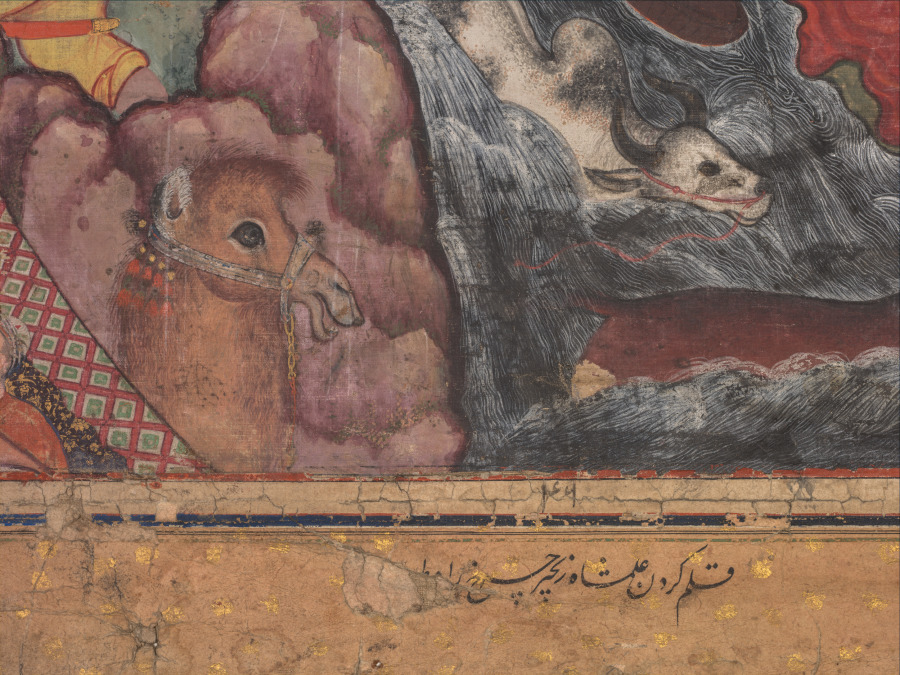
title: Alamshah cleaving asunder the chain of the wheel, from volume 11 of a Hamza-nama (Adventures of Hamza)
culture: Mughal India, court of Akbar (reigned 1556–1605)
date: c. 1560s–70s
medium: Gum tempera, ink, and gold on cotton and paper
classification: Painting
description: The hero, Alamshah the Greek, perches on a cliff above a rushing torrent of water. He has just slain the villain who raised the massive bronze plug on the dam in order to wash away the camp of Alamshah’s father, Hamza. The Hamza-nama recounts the adventures of an uncle of the Prophet Mohammed. It was the first major undertaking of the fledgling painting workshop created by Akbar. Originally in 14 volumes of 100 illustrations each, just a little more than 10 percent of the pages survive.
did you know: The title in the bottom margin is a continuation of the text on the previous page.